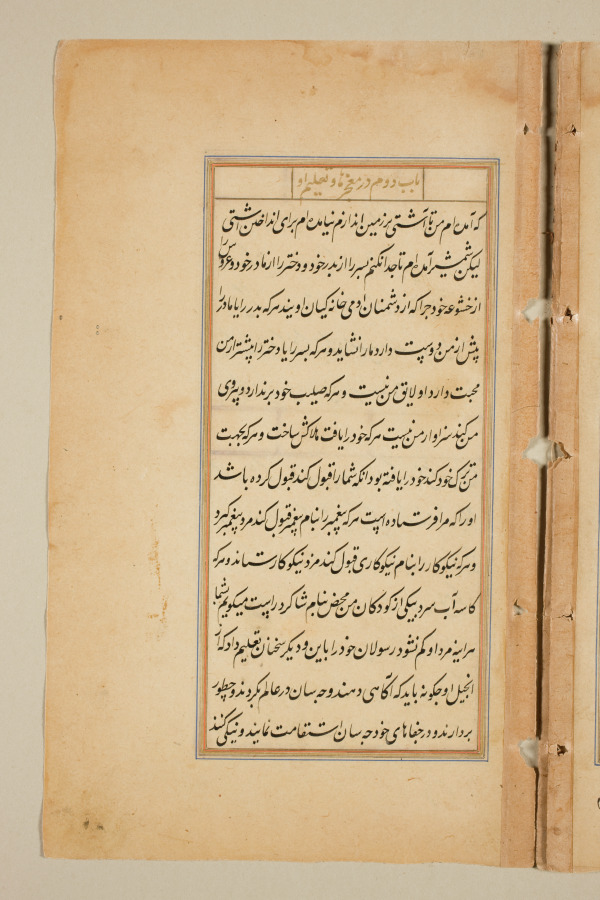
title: Text page from a Mirror of Holiness (Mir’at al-quds) of Father Jerome Xavier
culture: Mughal India, Allahabad, made for Prince Salim (1569–1627)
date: 1602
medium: Ink and gold on paper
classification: Manuscript